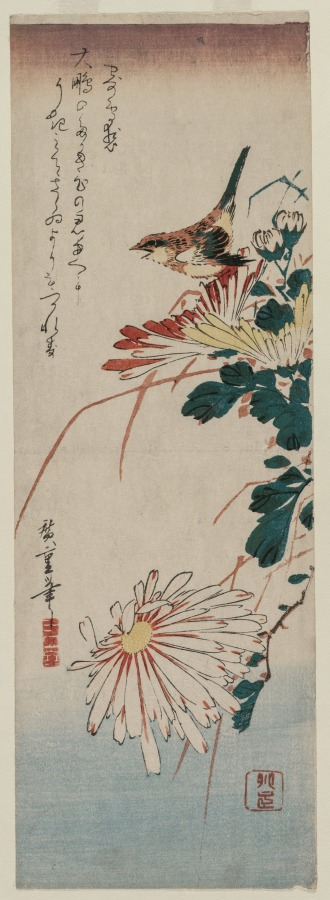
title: Wren and Chrysanthemums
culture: Japan, Edo period (1615–1868)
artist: Utagawa Hiroshige (Japanese, 1797–1858)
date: mid 1830s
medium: color woodblock print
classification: Print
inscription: Signature: Hiroshige hitsu Artist Seal: Ichiryusai Publisher: Kawaguchi Shozo (Kawasho)